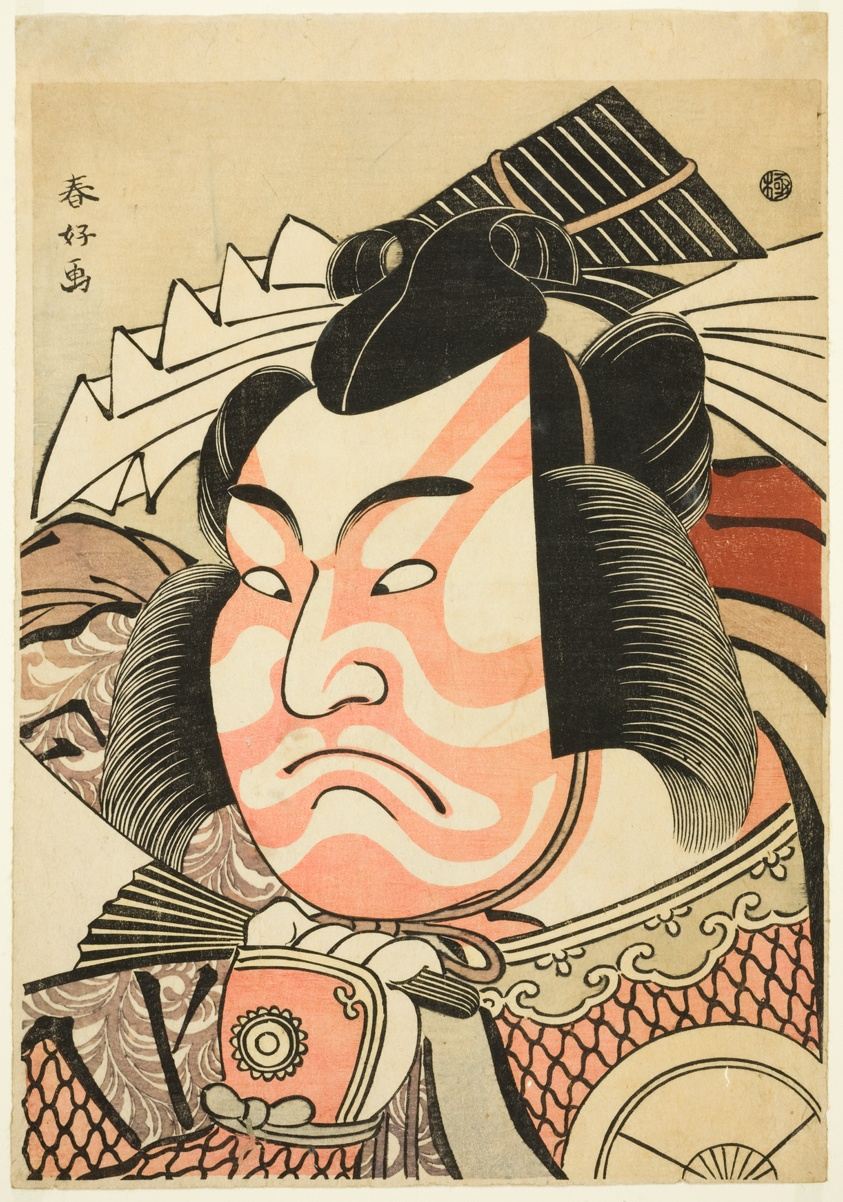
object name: Print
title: Actor Iwai Hanshirô IV as Akita Jônosuke Yoshikage in a “Shibaraku” role in “Memorial Service for St. Nichiren: A Model of ‘The Potted Trees’”(“Mieiko Nori no Hachi no Ki”)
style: Japanese (culture or style)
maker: Attributed to Katsukawa Shun’ei; Japanese, 1762–1819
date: About 1791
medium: Color woodblock print; aiban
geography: Japan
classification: woodblock print; print; asian art